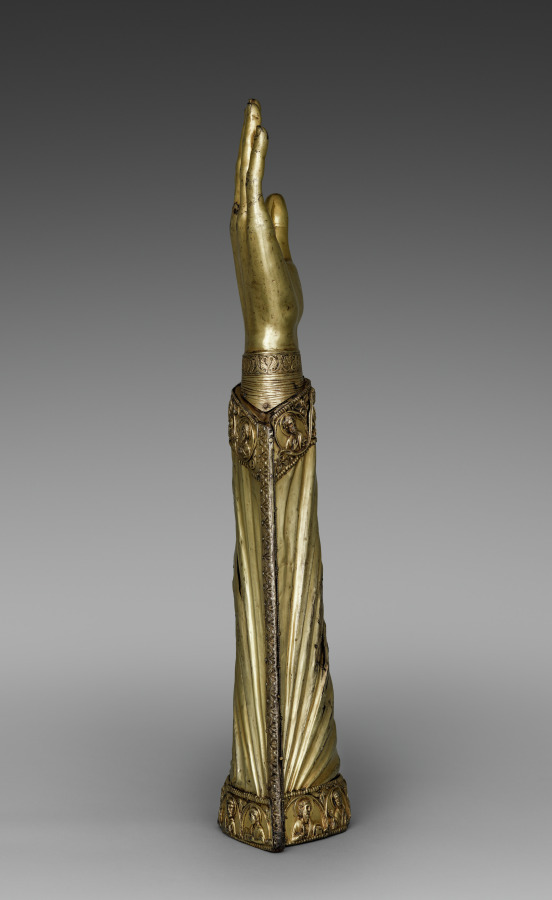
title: Arm Reliquary of the Apostles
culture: Germany, Lower Saxony, Hildesheim, Romanesque period, late 12th century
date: c. 1190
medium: gilt silver, champlevé enamel, oak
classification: Metalwork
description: Taking the form of a clothed lower arm with an outstretched hand, this reliquary from the Guelph Treasure appropriately enshrines a piece of an unidentified saint’s arm bone. Arm reliquaries like this one served as liturgical props; during religious services and processions, the clergy used them to bless and touch the faithful, thus making the presence of the saint more palpable and immediate. The apostle busts that decorate this arm reliquary seem to indicate that the relic it contains is that of an apostle. Duke Henry the Lion, a major patron of the church of Saint Blaise, is known to have received such relics from the Byzantine emperor Manuel I (1143-1180) upon his return from a pilgrimage to Jerusalem.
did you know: Reliquaries were prized not for the opulence that you see, but for the items that they held. They enshrined items associated with saints, like a piece of clothing they wore or a small portion of their remains. In this case, an arm bone is encased within.